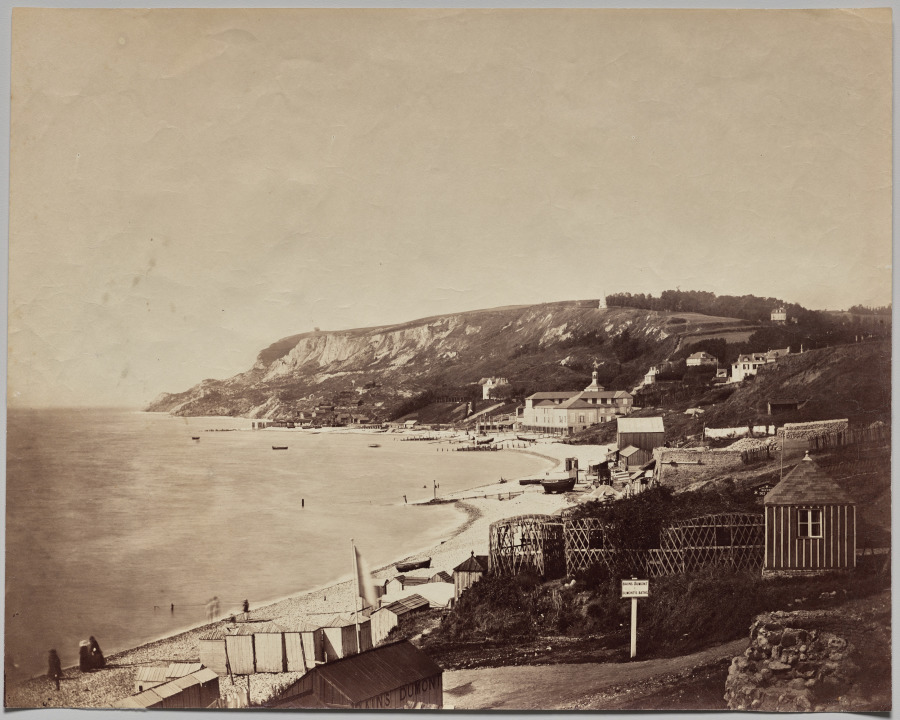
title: View of Ste-Adrese Beach with the Dumont Baths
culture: France, 19th century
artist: Gustave Le Gray (French, 1820–1884)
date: 1856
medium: albumen print from collodion negative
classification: Photograph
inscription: In graphite on verso: “392”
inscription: Written in brown ink on verso: “12,982”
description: One of the pioneering masters of French landscape photography, Gustave Le Gray shows us the bathing establishments and tourist hotels that dominated the waterfront of this town on the coast of Normandy. Monet focused instead on the more picturesque and timeless beach and fishing boats. Le Gray’s image is distinctly rooted in the present—that is, the present of 1856—in a way that seems shockingly modern.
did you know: Claude Monet painted this same beach, but his works avoid precisely what Gustave Le Gray’s camera reveals.